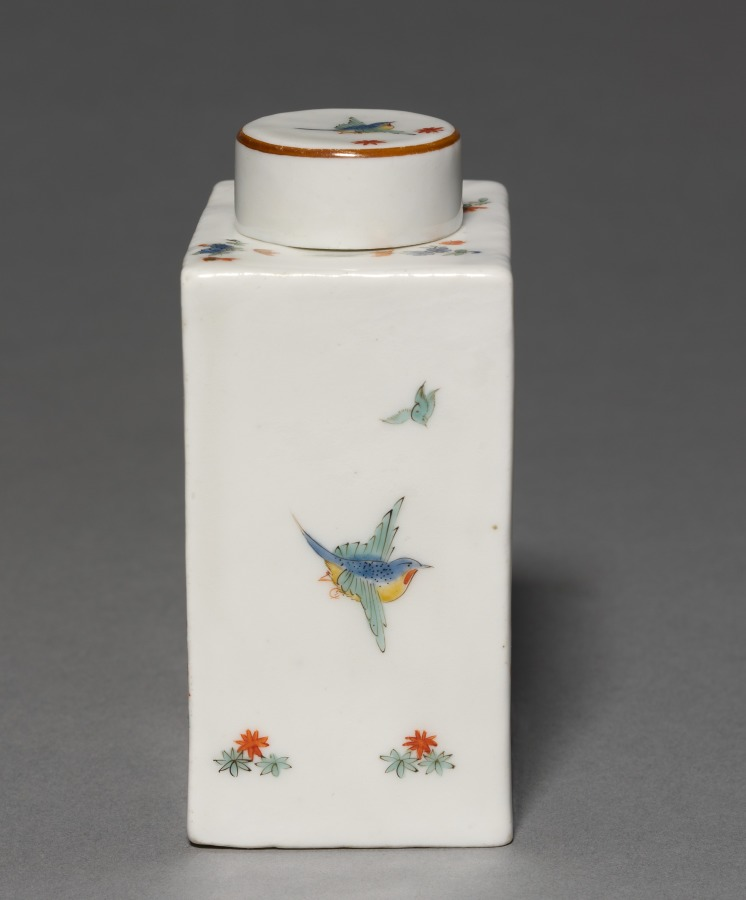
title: Tea Caddy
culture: Germany, Meissen, 18th century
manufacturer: Meissen Porcelain Factory (German, est. c. 1710)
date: c. 1735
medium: porcelain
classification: Ceramic